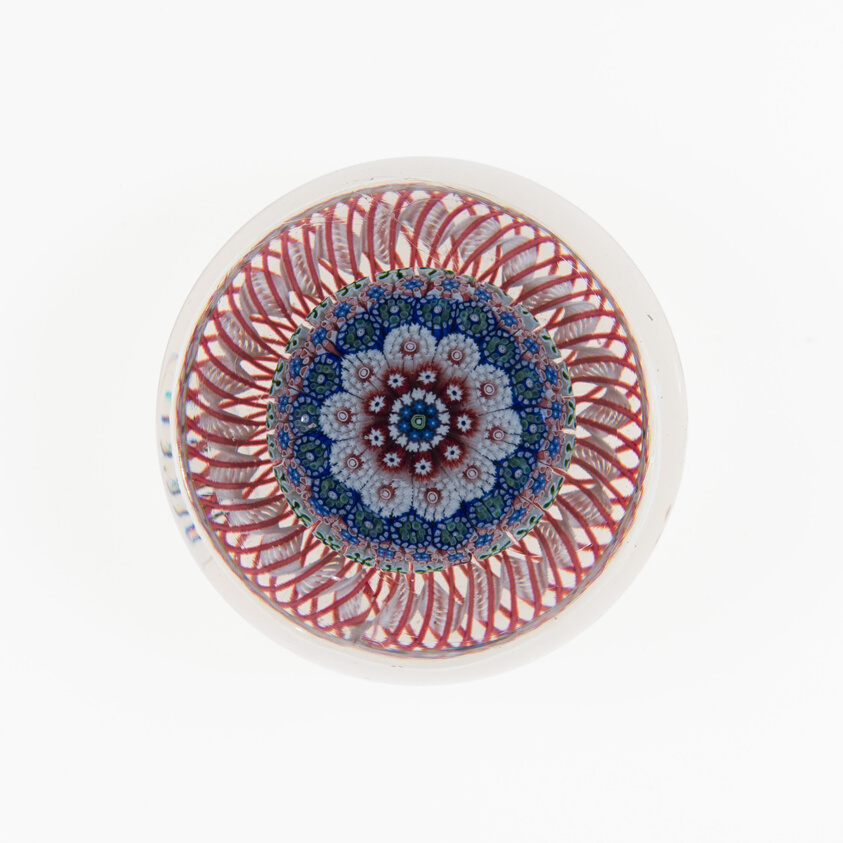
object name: Glass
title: Paperweight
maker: Saint-Louis Glassworks (Cristalleries de Saint-Louis); Lorraine, France, founded 1586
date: 1848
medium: Glass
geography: Saint-Louis-lès-Bitche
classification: paperweight; millefiori; european decorative arts; glass